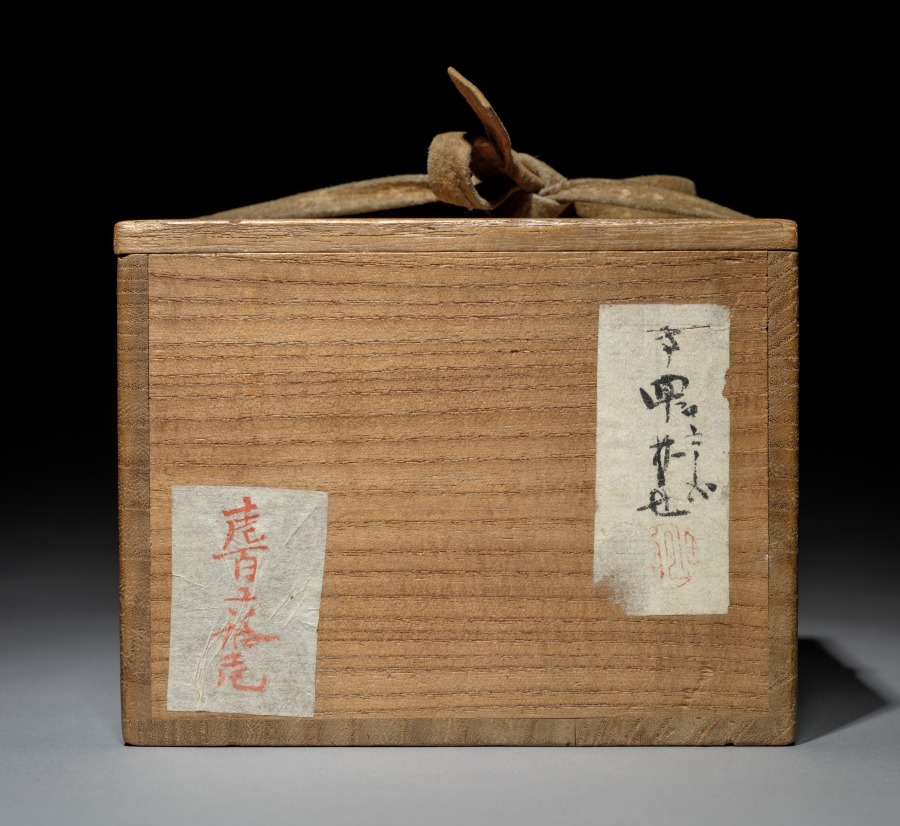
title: Tea Bowl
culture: Japan, Edo period (1615–1868)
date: 1600s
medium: stoneware with natural ash glaze (Shigaraki ware)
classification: Ceramic